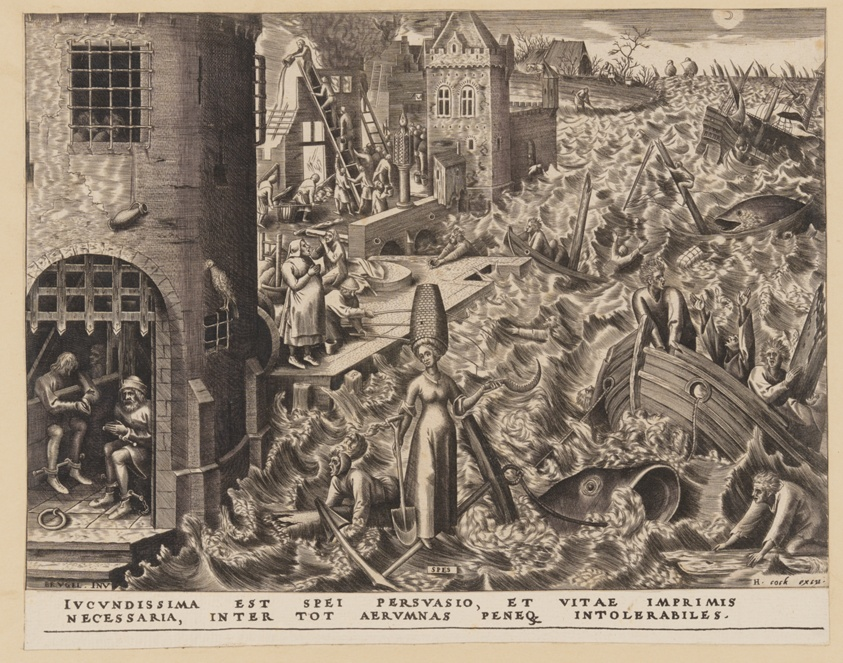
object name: Print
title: Hope, from The Seven Virtues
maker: Philip Galle (Flemish, 1537–1612); after Pieter Bruegel, the elder (Flemish, c. 1525–1569); published by Hieronymus Cock (Netherlandish, c. 1510–1570)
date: 1559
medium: Engraving on ivory laid paper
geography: Flanders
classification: engraving; paper; print; prints and drawing